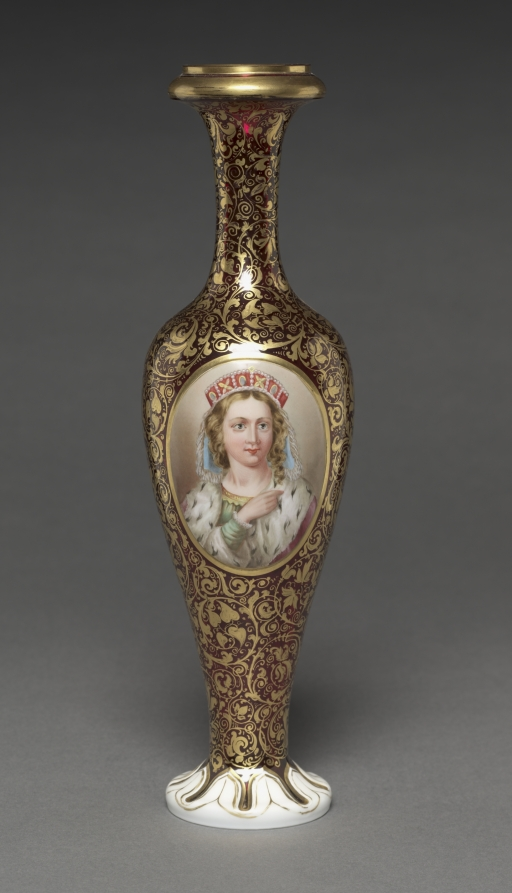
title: Vase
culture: Bohemia (?), 19th century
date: 1840–1860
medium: glass with enamel and gilt decoration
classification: Glass